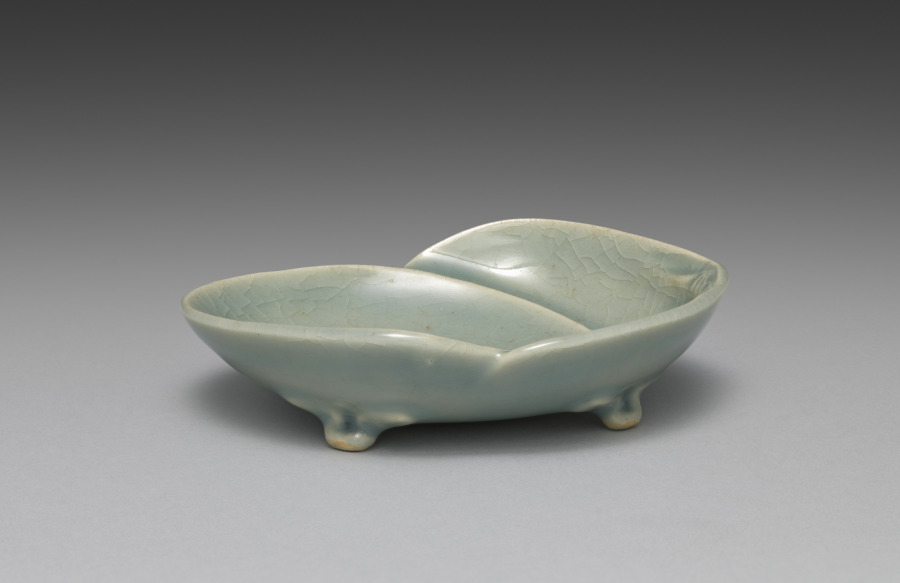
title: Dish from Saucers with Matching Shells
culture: Japan, Meiji period (1868–1912)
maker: Seifū Yohei III (Japanese, 1851–1914)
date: 1893–1914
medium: Porcelain with molded design and green crackled glaze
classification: Ceramic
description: Yohei III’s main output for his sophisticated clientele was in the form of tea sets and dining sets. He created a range of dishes in green glazes. He often produced in pairs, sets of five, or sets of ten. The set of five dishes with a more complex form is described as having a “water-colored glaze” (mizuiroyū). These are shaped like clam half shells, a reference to a game in which shell halves painted with narrative scenes or a variety of motifs must be matched back together by the players. The dishes have molded details to articulate the shell forms, and the crackling across each shell adds another dimension to the surface. Each dish is set on three small feet, formed by a pinched piece of clay and attached to an unglazed area on the underside of the dish. Curiously, while four of the dishes are stamped with the artist’s mark, one has instead a signature carved into the base.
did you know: The saucers are meant to look like matched halves of clam shells in reference to a once popular game.